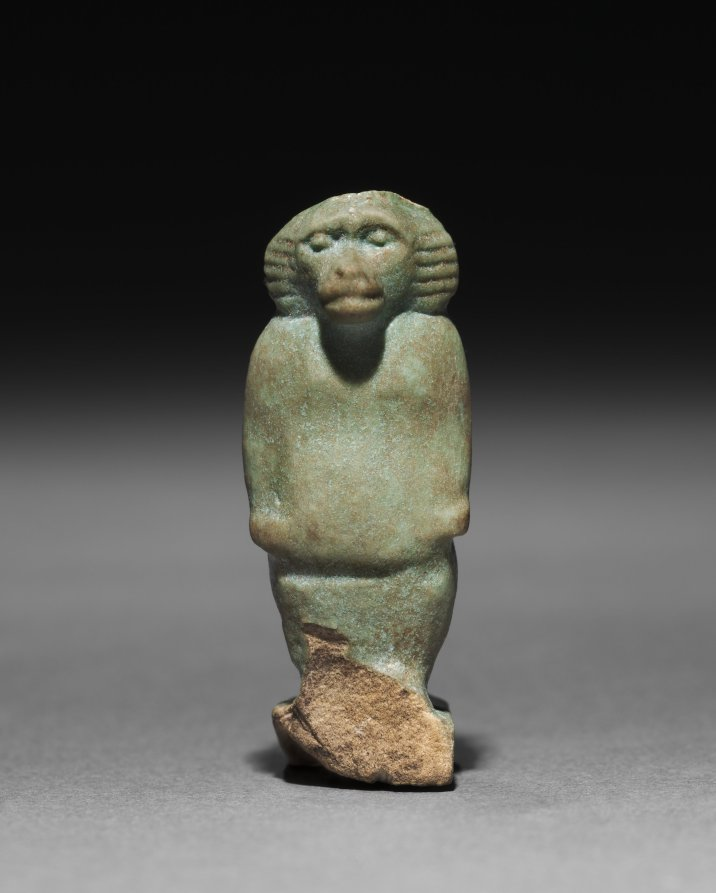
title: Baboon-Falcon Hybrid Amulet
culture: Egypt, Late period (715–332 BCE)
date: 715–332 BCE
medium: pale robin's egg blue faience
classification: Amulets